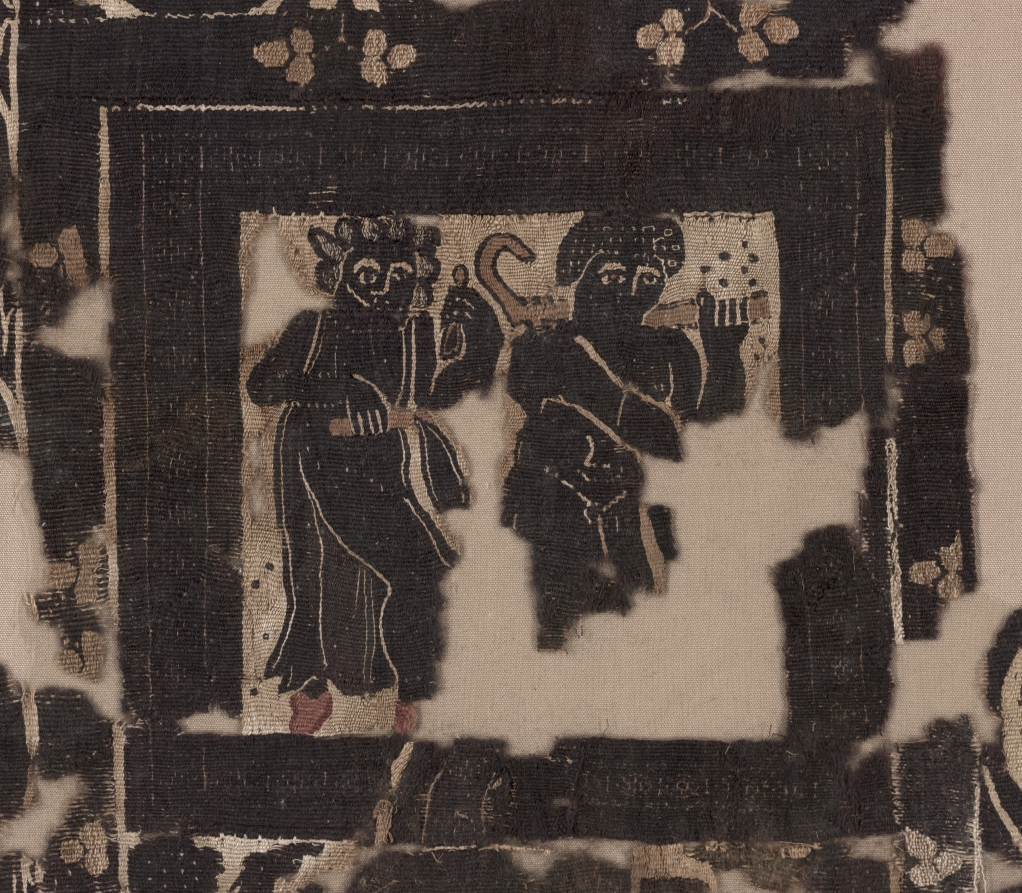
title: Curtain Panel with Scenes of Merrymaking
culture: Egypt, Byzantine period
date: 500s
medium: Linen, undyed; wool: dyed; tapestry weave with supplementary weft wrapping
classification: Textile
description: This large panel conveys merrymaking, wealth, and power through its symbolic imagery and deep purple color. It was originally part of a luxurious wide curtain with similar panels alternating with plain linen panels. Although woven in Christian Egypt, the panel is dominated by pagan subjects. A nude male stands beside a dancing female in transparent clothing in each of the three squares, alternating with centaurs (half-man, half-horse creatures) in roundels. In the central square, Dionysus, the god of wine, holds a grapevine and a weary Hercules leans on his club below. The lively animal imagery conveys wealth because few could afford animals such as lions, bulls, and hares.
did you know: The textile industry drove the Egyptian economy, dominated by the flax plant from which linen is derived.